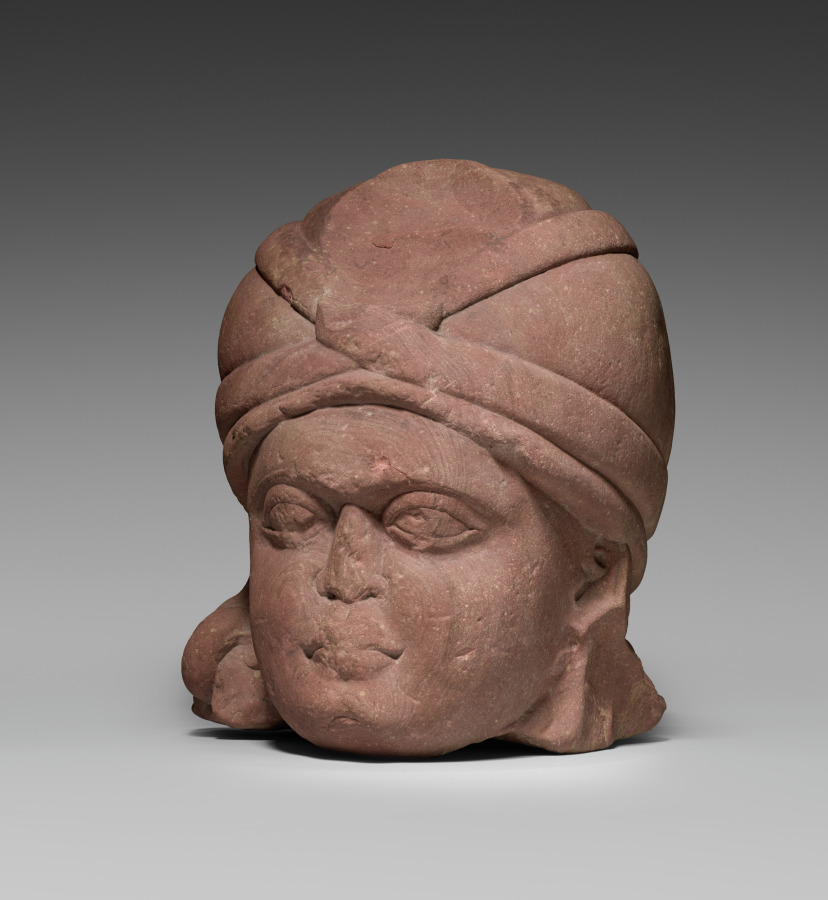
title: Head of a Yaksha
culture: Northern India, Uttar Pradesh, Mathura, Shunga period (185–78 BCE)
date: c. 125 BCE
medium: mottled red sandstone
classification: Sculpture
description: Colossal statues of yakshas, male divinities who personify the productive forces of nature, were especially popular in the northern Indian region around the ancient city of Mathura. They were installed in shrines in parks and gardens, often associated with extraordinary trees. The red sandstone is from a nearby quarry, called Sikri.